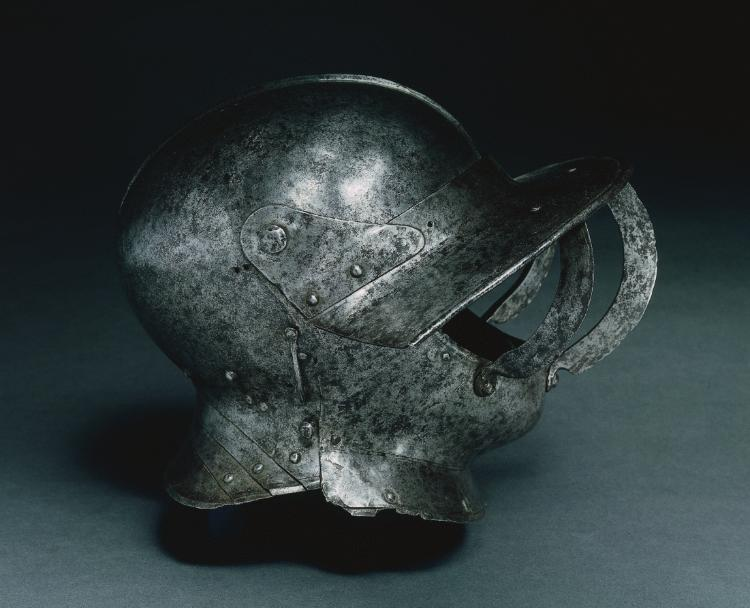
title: Close Helmet (Burgonet)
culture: Italy, Milan (?), early 16th Century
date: early 1500s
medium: steel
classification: Arms and Armor